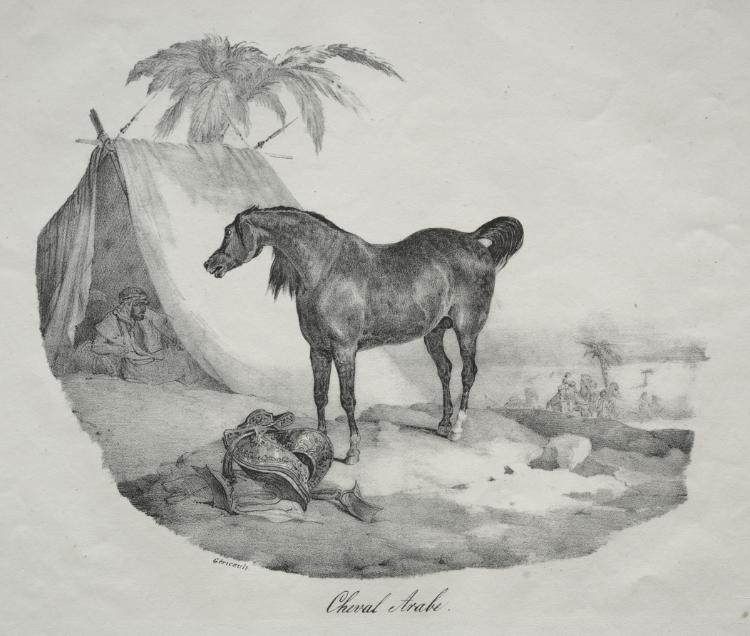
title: Arab Horse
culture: France, 19th century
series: Lithographic Studies of Horses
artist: Théodore Géricault (French, 1791–1824)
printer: Godefroy Engelmann (French, 1788–1839)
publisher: Gihaut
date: 1822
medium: lithograph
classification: Print